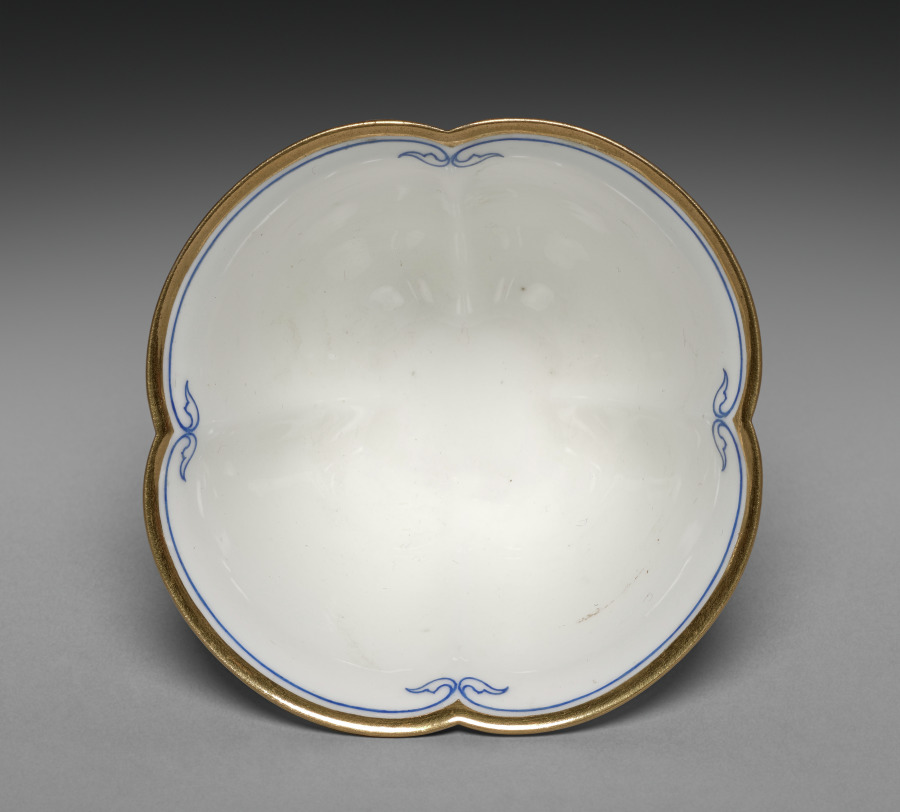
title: Cup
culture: France, Sèvres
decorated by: Guyonnet (French)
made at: Sèvres Porcelain Factory (French, est. 1756)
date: c. 1848–55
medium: hard-paste porcelain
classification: Ceramic